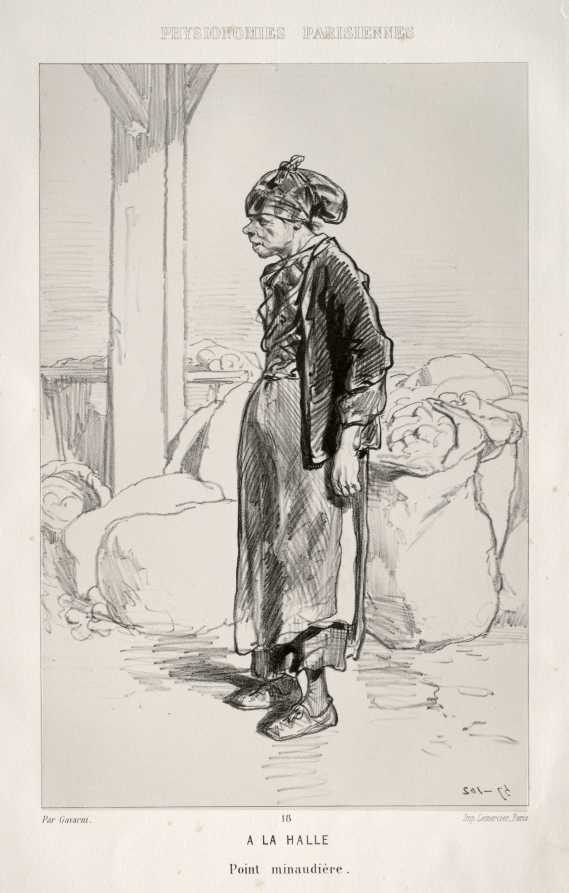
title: À la Halle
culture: France, 19th century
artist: Paul Gavarni (French, 1804–1866)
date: c. 1857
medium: lithograph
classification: Print